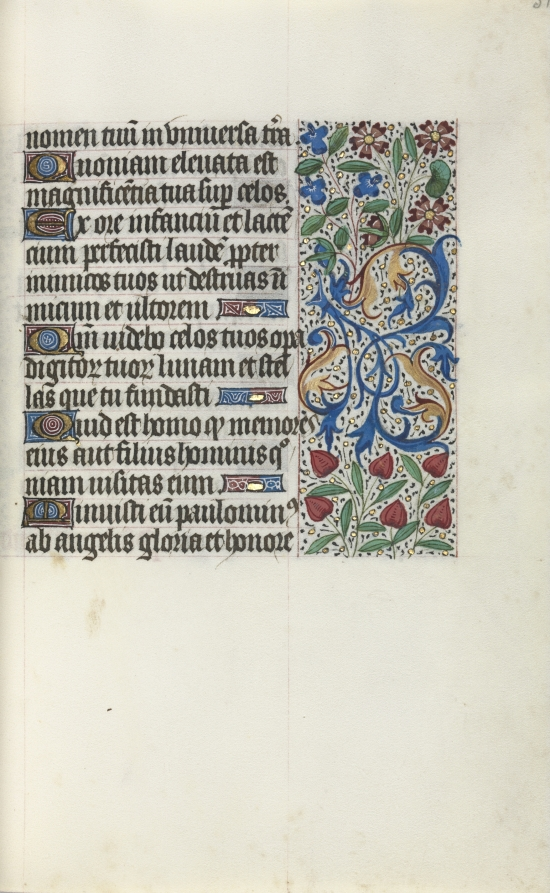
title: Book of Hours (Use of Rouen): fol. 31r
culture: France, Rouen, 15th century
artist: Master of the Geneva Latini (French, active Rouen, 1460–80)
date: c. 1470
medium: ink, tempera, and gold on vellum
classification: Bound Volume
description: In the late 1400s and early 1500s Rouen was an established and important center of book production. The city’s cathedral had a wealthy chapter that spent large sums of money to commission books and to maintain its extensive library. The stationers and booksellers would have likely been concentrated in or near the cathedral precinct. This artist, named after a manuscript now in Geneva, was Rouen’s principal illuminator during the second half of the 1400s.